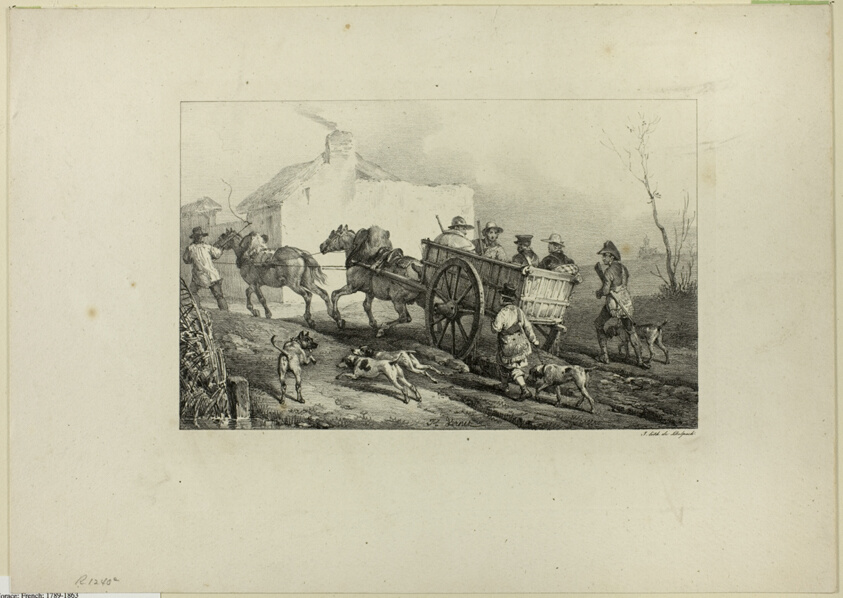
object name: Print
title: Hunters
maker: Horace Vernet (French, 1789-1863); printed by Francois Seraphin Delpech (French, 1778-1825)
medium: Lithograph in black on ivory wove paper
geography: France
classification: lithograph; print; prints and drawing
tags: dogs, animals